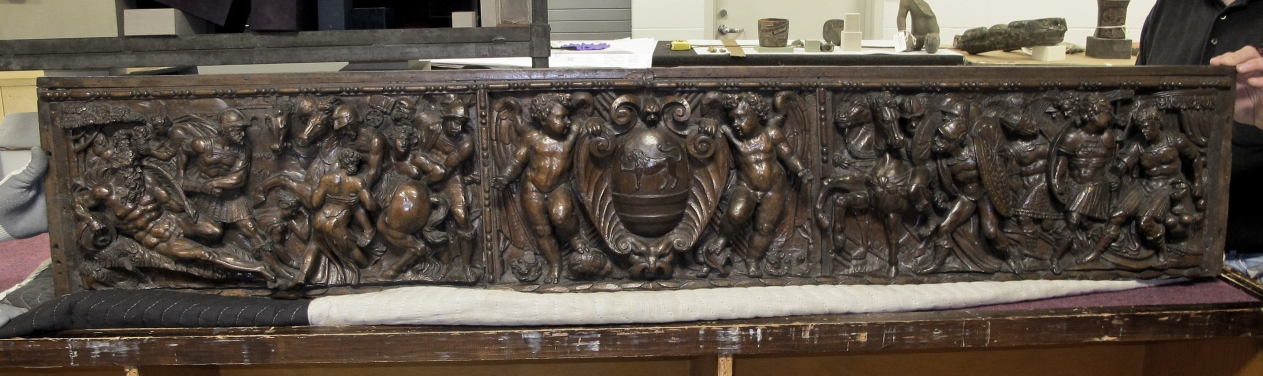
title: Cassone Frontal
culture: Italy, 16th century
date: 1500s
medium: walnut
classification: Furniture and woodwork